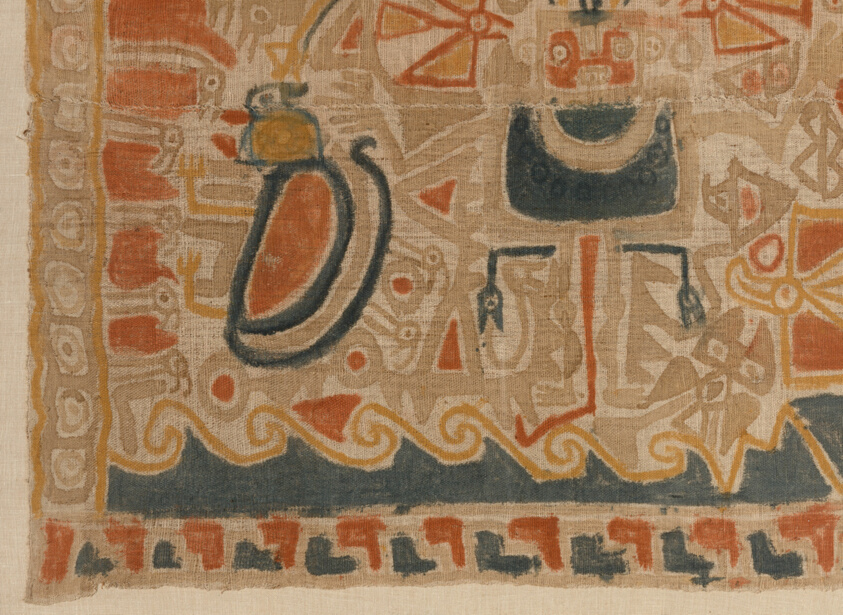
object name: Textile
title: Painted Textile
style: chimú capac, Arts of the Americas, andean, peruvian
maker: Probably Chimu Capac, Supe Valley, north coast, Peru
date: c. 1000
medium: Cotton, plain weave; painted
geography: Peruvian North Coast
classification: textile; cotton; art of the americas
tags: figures (representations), feline, birds, waves, serpents